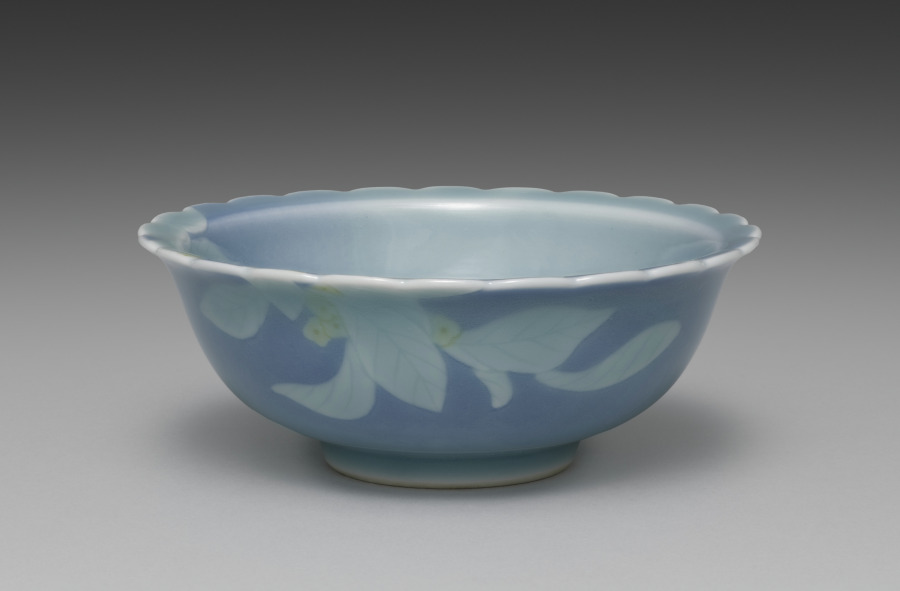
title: Dish from Dishes with Flowers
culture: Japan, Taishō period (1912–26) or Shōwa period (1926–89)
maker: Seifū Yohei IV (Japanese, 1872–1951)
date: 1914–46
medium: One from a set of five dishes; porcelain with underglaze yellow and blue glaze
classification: Ceramic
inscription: 清風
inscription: 清風造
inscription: 成山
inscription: 清風盧人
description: One can imagine a cool summer breeze when looking at this set of dishes, each shaped with a crenulated mouth and glazed with blue. Around the rim and into the basin, the bowls have low-relief designs of flowers with underglaze yellow petals; their leaves and stems show white through the glaze. On each dish, the design continues over the rim onto one side.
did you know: Seifū Yohei IV’s dishes with flowers feature underglaze yellow.